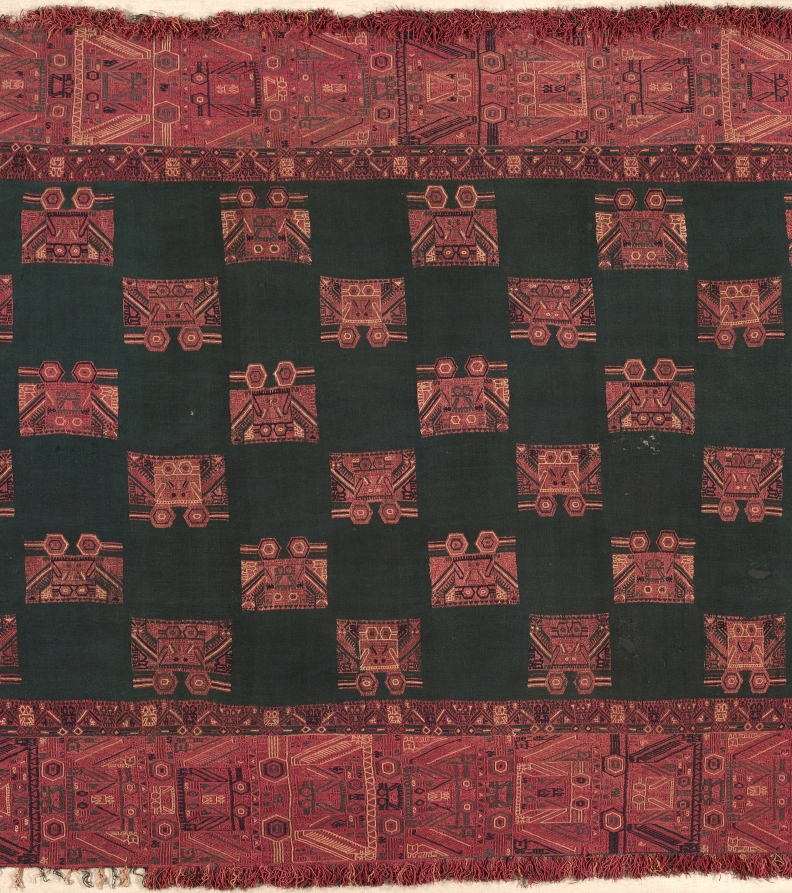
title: Mantle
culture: Peru, South Coast, Paracas (Cavernas) style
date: c. 300 BCE–200 CE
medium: camelid fiber: plain weave with embroidery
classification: Textile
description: Buried in shaft-tombs, or rectangular sunken chambers, the Paracas dead were wrapped in layers of cloth and accompanied by pottery, food, and other offerings. The dry environment of the Paracas Peninsula helped preserve many of these textiles, including richly ornamented garments buried with important individuals. This mantle, probably worn like a cloak, relates closely to the tunic (CMA 1946.227) and long headband (CMA 1946.228) due to their shared imagery. Its double-headed bird motifs— embroidered in vivid red, blue, yellow, and green yarns—likely had symbolic significance, although the specific meaning remains unknown.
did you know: The profusion and decoration of textiles in Paracas burials shows the value placed on cloth.